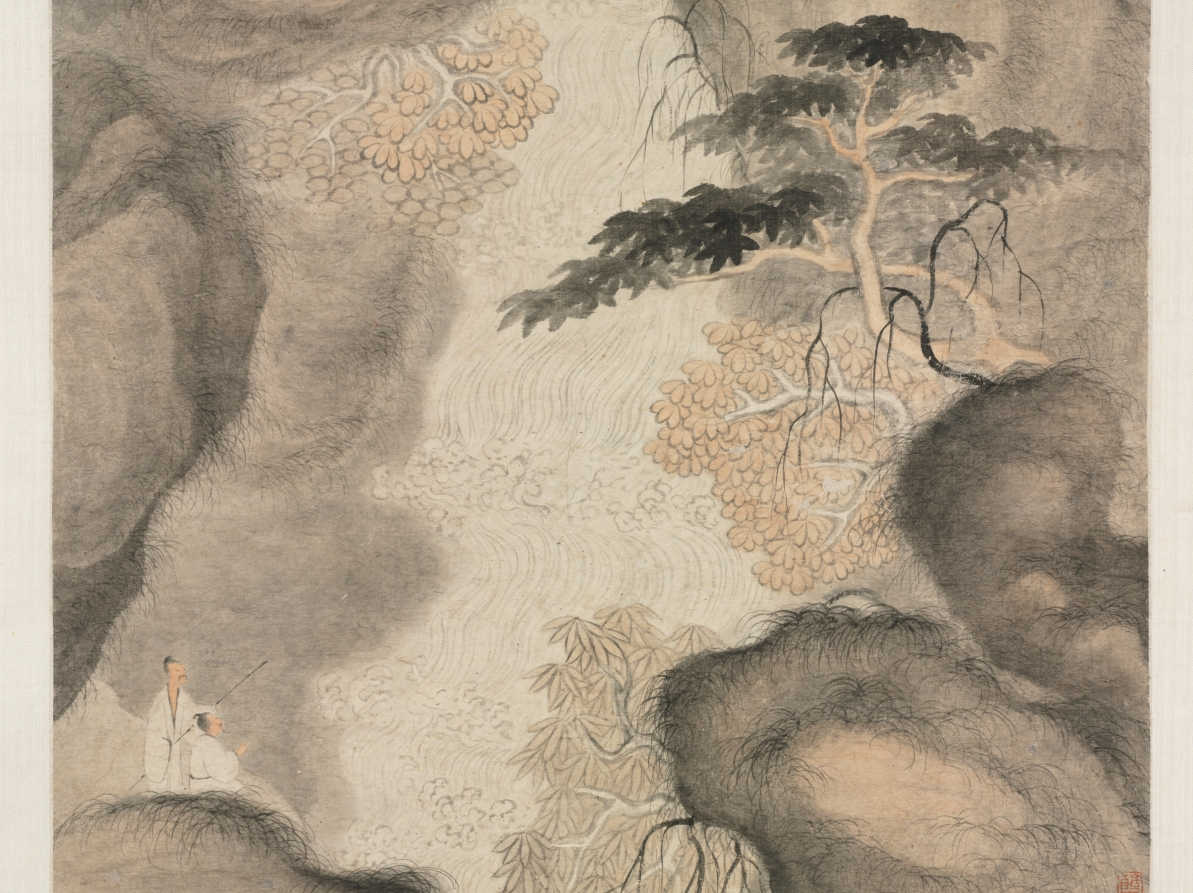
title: Nine Dragon Pool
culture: China, Qing dynasty (1644-1911)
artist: Mei Qing (Chinese, 1623–1697)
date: 1690s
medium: hanging scroll, ink and light color on paper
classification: Painting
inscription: 太古蟄龍醒，蠺叢霹靂開。 五溪雲不去，三峽雪飛來。 瞿山, 清。 [印] 梅清; 淵公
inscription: 2 additional seals: 1 of Dai Xi 戴煕 (1801–1860); 1 unidentified.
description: In the second half of the 1600s, Huangshan 黃山 (Mt. Huang or Yellow Mountain) attracted many visitors and inspired artists like Mei Qing. He probably sketched the Nine Dragon Pool on his second trip to the mountain range in 1690, at the advanced age of 68 sui. This dramatic waterfall has nine curves, each forming an emerald green pool. After heavy rain, the rushing water looks like nine white dragons.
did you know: Huangshan 黃山 is a UNESCO World Heritage site known for its spectacular rocky peaks, sea of clouds, oddly shaped pine trees, and hot springs.